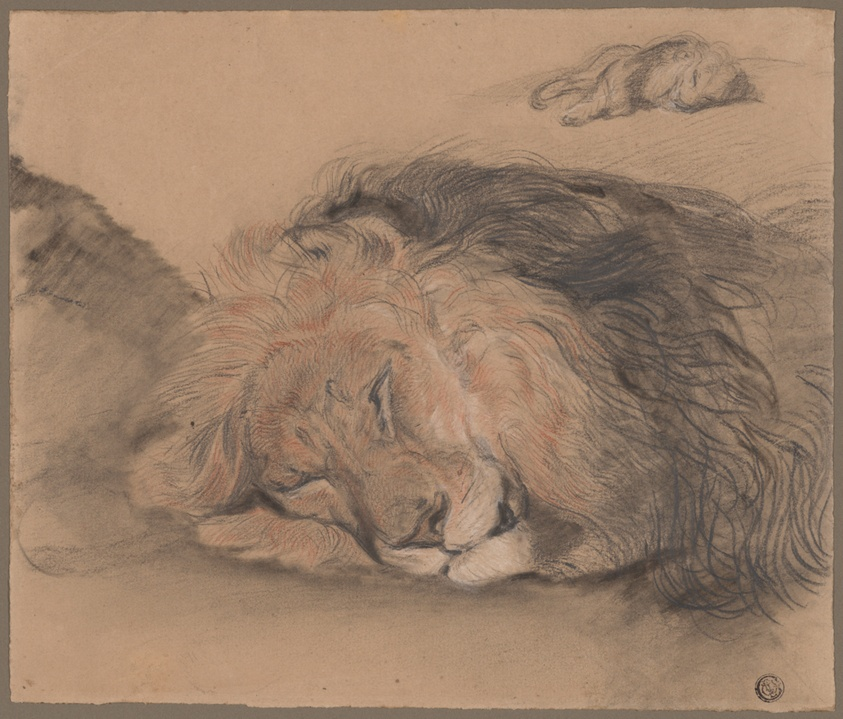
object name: Drawing and Watercolor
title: Lion's Head and Sketch of a Lion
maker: Edmé Saint-Marcel (French, 1819-1890)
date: c. 1860-70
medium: Charcoal and graphite, with stumping, and red chalk with touches of white chalk, on brown wove paper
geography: France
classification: chalk; drawings (visual works); prints and drawing